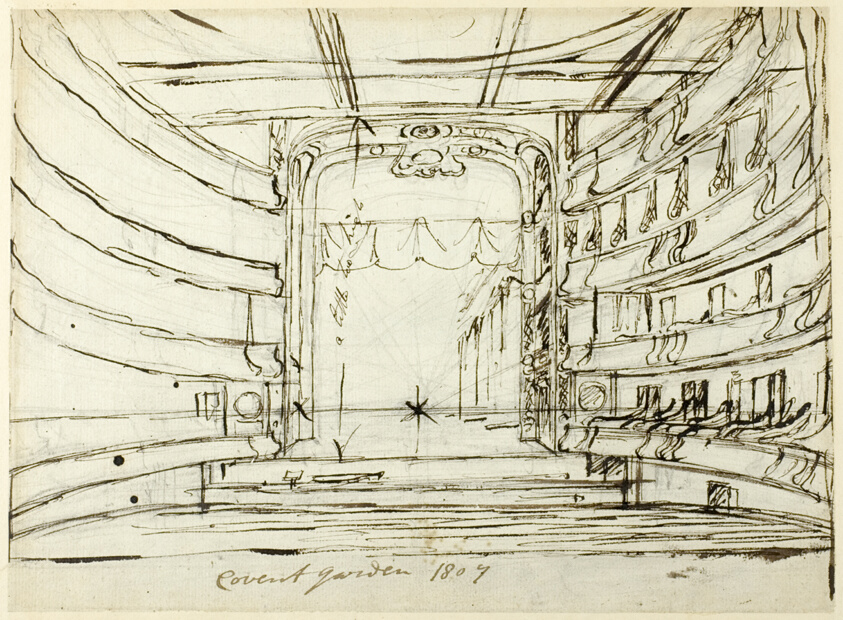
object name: Drawing and Watercolor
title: Study for Covent Garden Theatre, from Microcosm of London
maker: Augustus Charles Pugin (English, born France, 1762-1832)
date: 1807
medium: Brush and brown wash with pen and brown ink over graphite, on ivory laid paper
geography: England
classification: pen and ink drawings; ink or chalk wash; ink and wash; drawings (visual works); prints and drawing